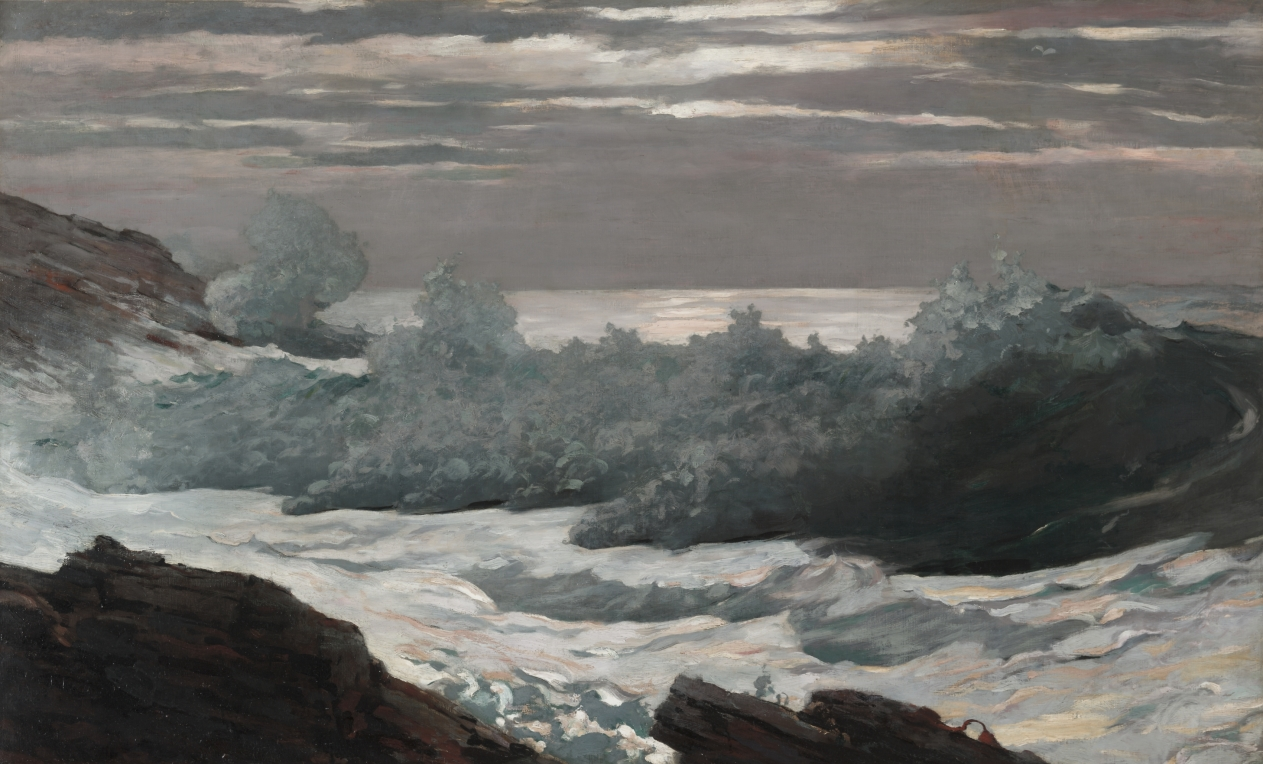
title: Early Morning After a Storm at Sea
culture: America, late 19th-early 20th Century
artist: Winslow Homer (American, 1836–1910)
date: 1900–1903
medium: oil on canvas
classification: Painting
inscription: Signed lower left: "HOMER / 1902"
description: The powerful Atlantic surf pounding against the desolate coast of Prouts Neck, Maine, provided primary subject matter for the dramatic paintings that Homer created during his final decades. This example, which the artist proclaimed as "the best picture of the sea that I have painted," was initially conceived as a watercolor. Undertaking the composition in oil after a lapse of nearly two decades, Homer patiently waited for the appropriate atmospheric conditions, executing the work in four different sessions spread over two years.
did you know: Winslow Homer's studio in Prouts Neck, Maine, is a National Historic Landmark.